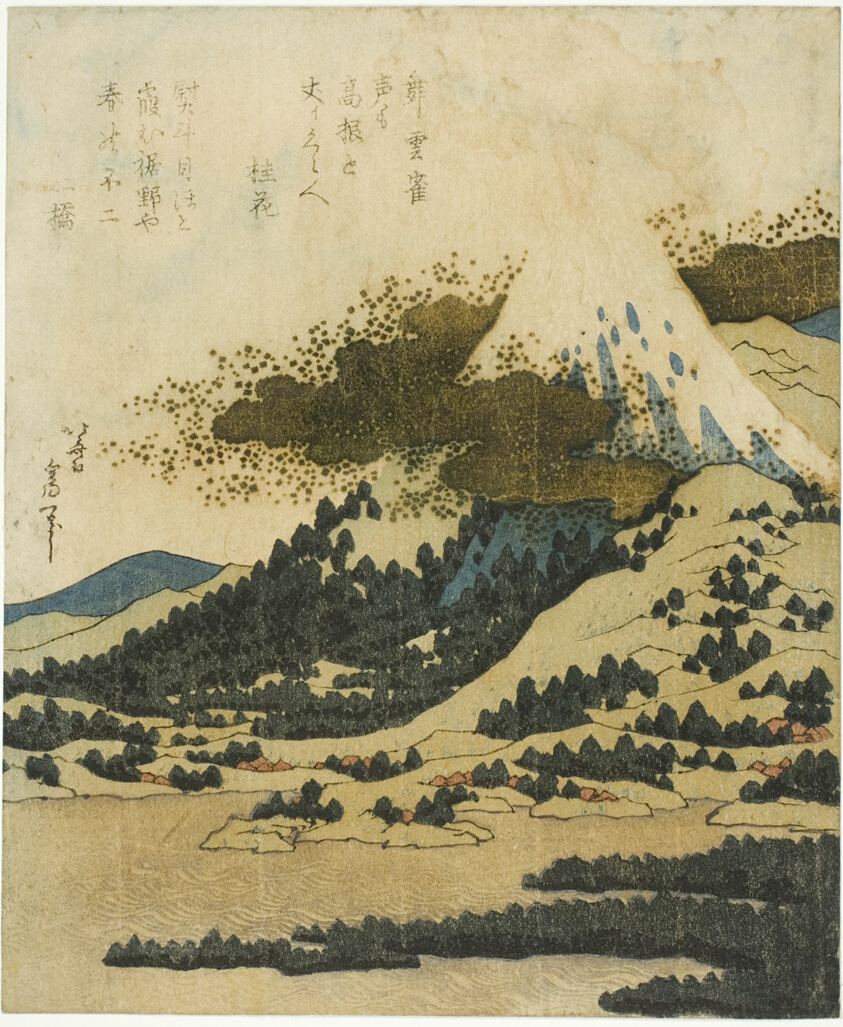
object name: Print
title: Mount Fuji from Lake Ashi in Hakone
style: Japanese (culture or style)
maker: Katsushika Hokusai 葛飾 北斎; Japanese, 1760-1849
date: c. 1830/35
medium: Color woodblock prints with metallic pigments; shikishiban, surimono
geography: Japan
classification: woodblock print; print; asian art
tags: landscapes